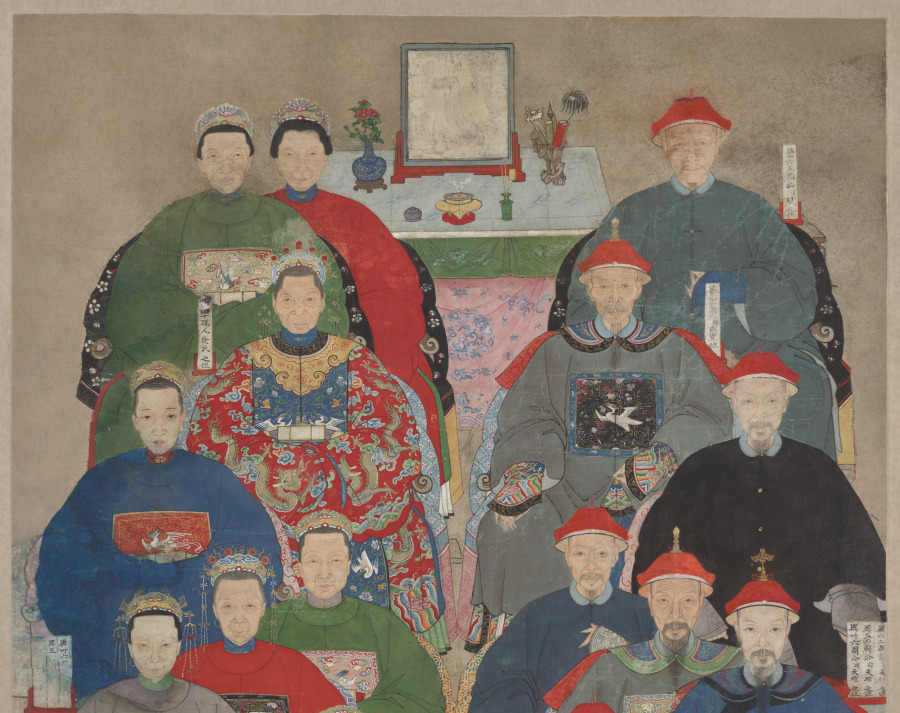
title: Ancestor Group Portrait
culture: China, Qing dynasty (1644-1911), Jiaqing period (1796-1820)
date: 1796–1820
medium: Hanging scroll; ink and color on paper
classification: Painting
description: From top to bottom this scroll features various generations of ancestors with men on the right and women on the left, 30 figures altogether. Inscribed tablets give their rank and relation within the family. Square badges on their robes indicate each figure's rank as an official. Scrolls of this type were displayed for worship at home during the New Year celebrations.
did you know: Court officials' wives could wear the same rank badge as their spouses.